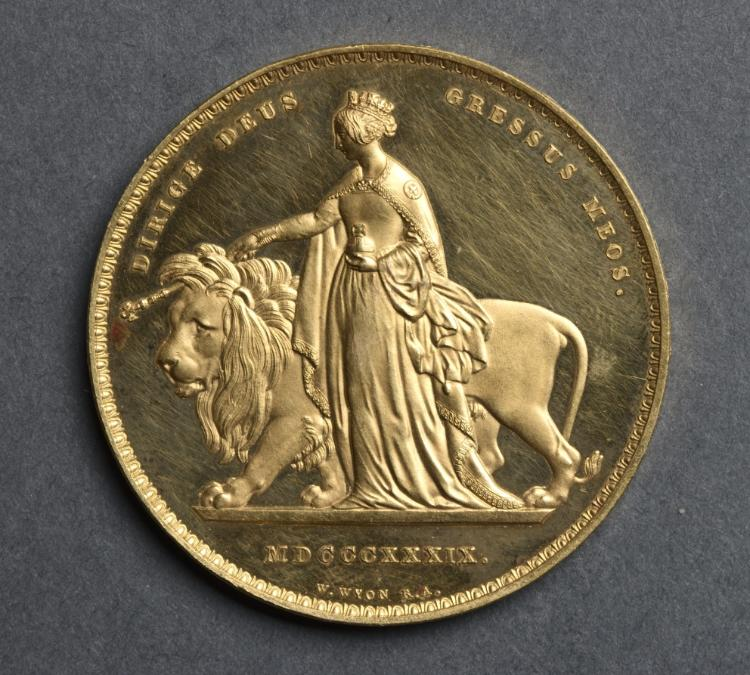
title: Five Pound Piece: Una, Guiding the Lion (reverse)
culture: England, Victoria, 1837-1901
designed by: William Wyon (British, 1795–1851)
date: 1839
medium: gold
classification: Coins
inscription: DIRIGE DEUS GRESSIUS MEOS; below: MDCCCXXXIX; W. WYON R.A.